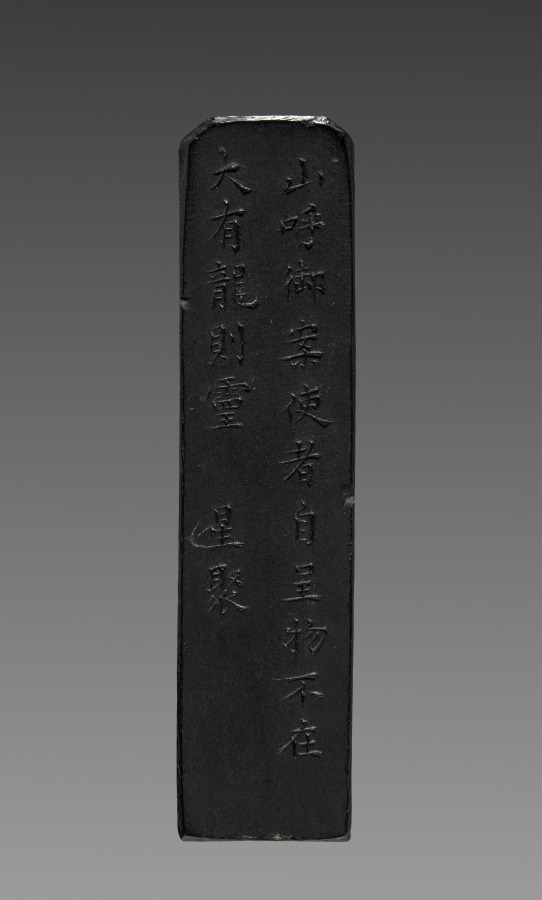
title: Ink Cake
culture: China, Qing dynasty (1644-1911)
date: 19th Century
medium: ink cake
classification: Miscellaneous